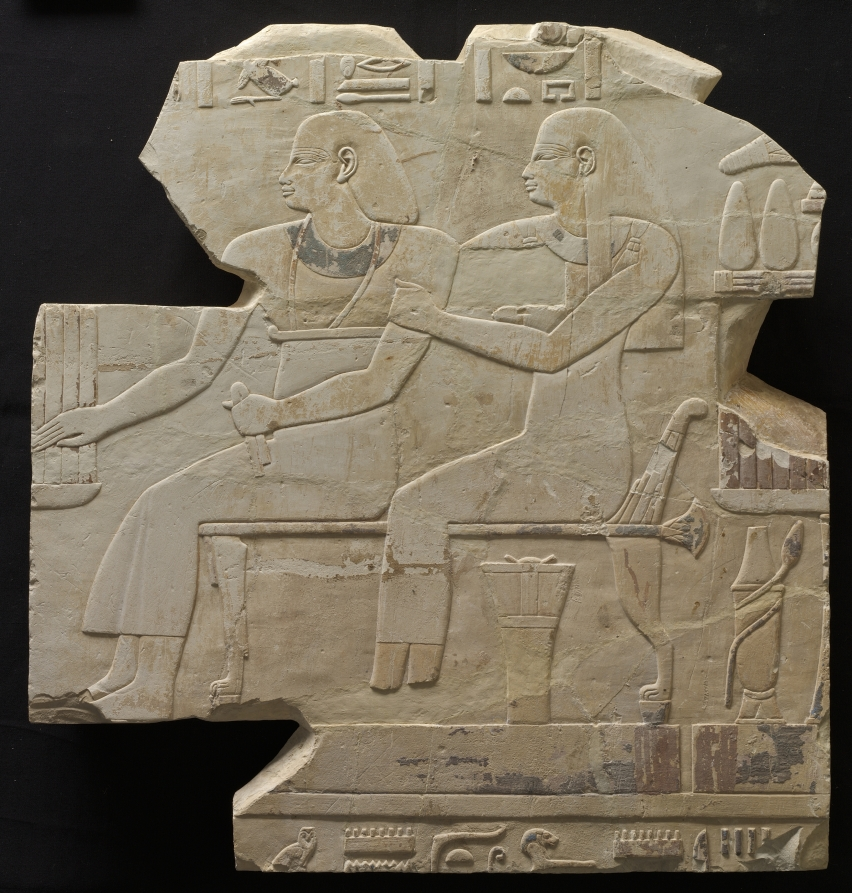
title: Seated Couple: Mentuemhat's Ancestors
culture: Egypt, Late period (715–332 BCE), Dynasties 25–26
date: c. 667–647 BCE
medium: limestone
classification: Sculpture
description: A deceased vizier, whose name ended in Nufer, and his wife seated before a table of offerings. Presumably they were relatives of Mentuemhat. The work is in the style of early Dynasty XVIII.